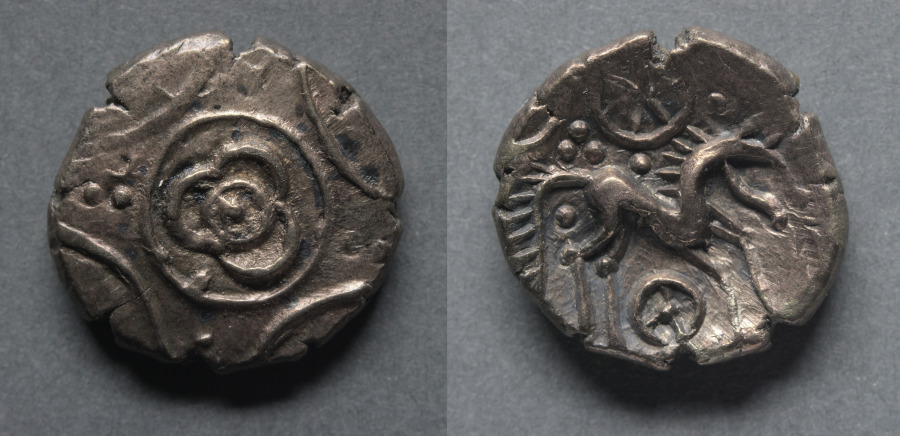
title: Stater: Three-Petal Flower (obverse); Horse and wheels (reverse)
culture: England, Iceni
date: 20 BCE–10 CE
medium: gold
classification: Coins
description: The Iceni were a native tribe inhabiting Norfolk, Suffolk, and parts of Cambridgeshire. They were described by the Romans as powerful, unbroken by war. In AD 61 the king of the Iceni, Prasutagus, died, leaving his apparently considerable wealth to his two daughters and to the Roman Emperor, as joint heirs. However, while the Roman legions under Aulus Plautius were in Wales taking drastic steps to exterminate Druidism, Boadicea, the widow of Prasutagus, was ill-treated by the Romans and her two daughters were outraged. The Iceni rose in revolt and helped by their neighbors the Trinovantes, they overran the Roman settlements. It is said that 70,000 Romans were massacred at Camulodunum, and the Iceni, with Boadicea in a war chariot at their head, sacked and burned Verulamium (St. Albans, Hertfordshire), and London. Suetonius, one of the leading Roman generals, returned from the west with all possible speed and came up with the Iceni in the northwest of Roman London. Here a great battle was fought, resulting in a complete victory for the disciplined Roman forces; thousands of Britons were killed. The site of this battle is supposed to have been near what is now Kings Cross, in central London, commemorated by Battle Bridge Road.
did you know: The obverse design may be a rose, a flower that appears on many earlier, mostly Greek, coins.